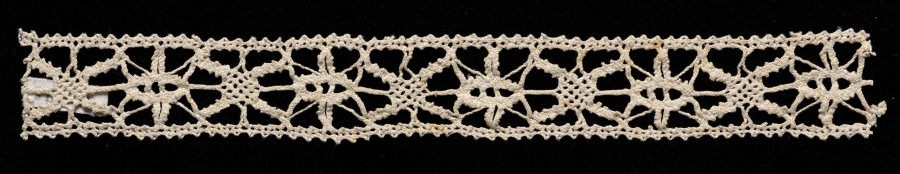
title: Lace Insertion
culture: Italy, Venice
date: 1540–60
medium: Bobbin lace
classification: Lace